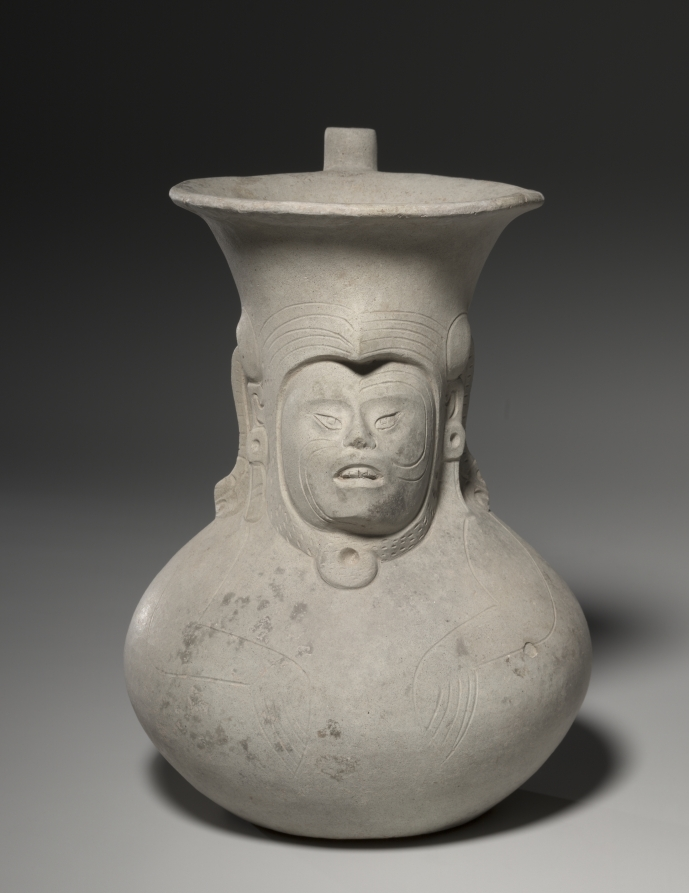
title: Figural Vessel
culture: Mexico, Oaxaca, Zapotec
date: c. 500–150 BCE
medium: earthenware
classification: Sculpture